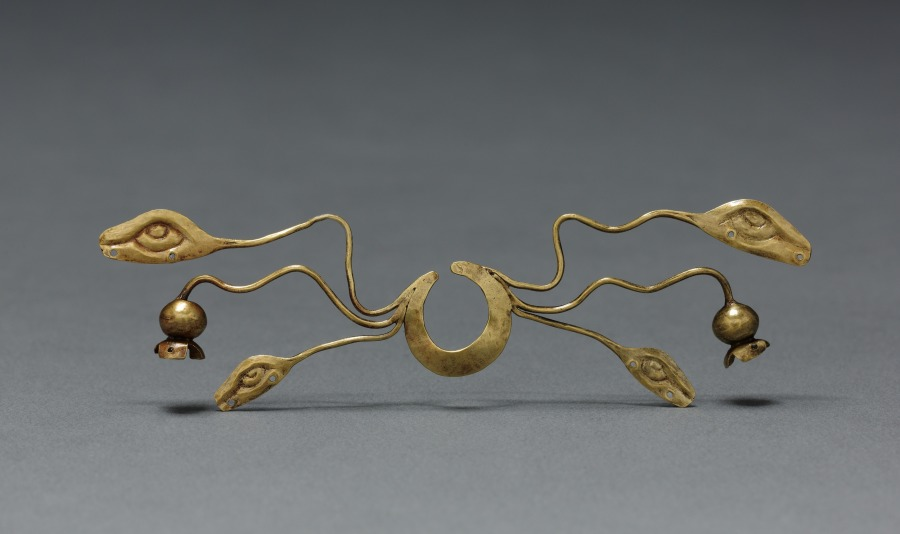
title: Nose Ornament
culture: Peru, North Highlands, Chavín de Huantar(?), Chavín style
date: c. 500–200 BCE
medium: cut and hammered gold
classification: Metalwork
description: There seems to be a link between Chavín religion and appearance of the Andes’ first large precious-metal objects, made using revolutionary new metallurgical processes. Chavín may have developed these technical innovations to express the inexpressible, the "wholly other" nature of its religion. In many areas, elite men and women wore the ornaments as emblems of their ties to this religion, and eventually were buried with them. These 16 objects, along with three others not in the museum’s collection, are said to have come as a group from Chavín itself.